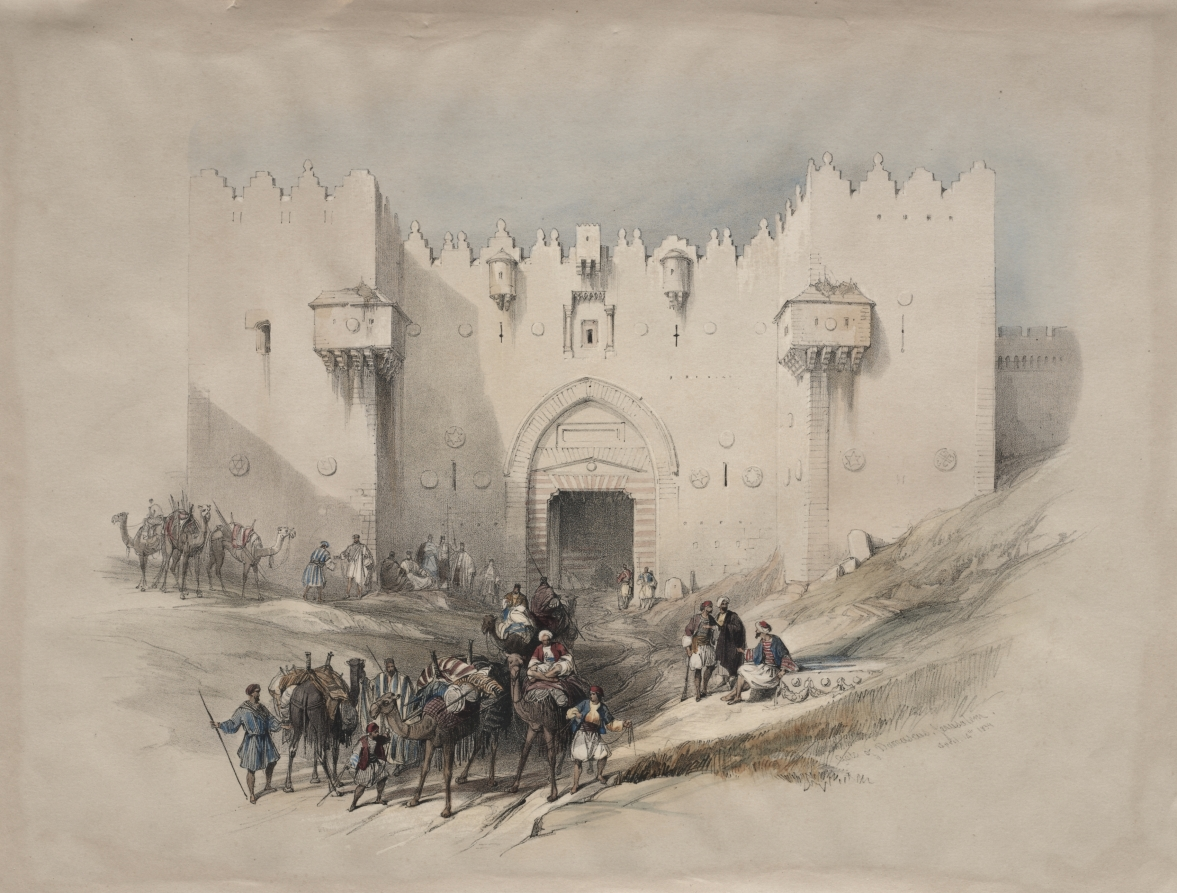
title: Gate of Damascus, Jerusalem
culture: England, 19th century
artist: David Roberts (Scottish, 1796–1864)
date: 1839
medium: color lithograph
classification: Print